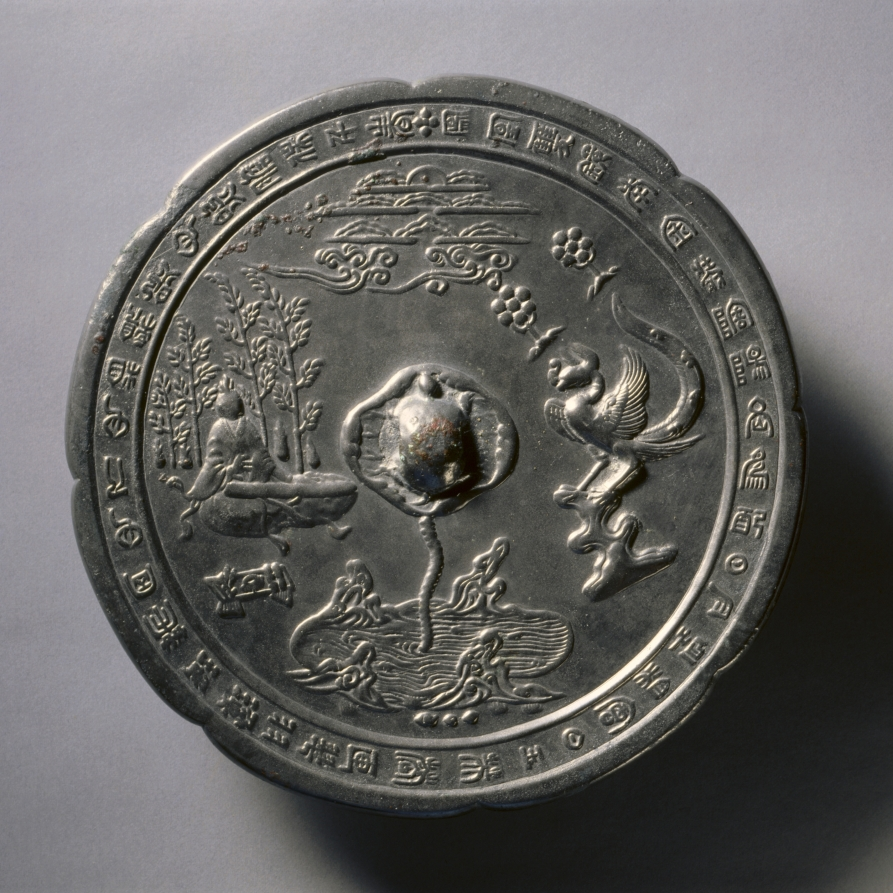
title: Lobed Mirror with a Tortoise Knob, Musician, and Phoenix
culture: China, Tang dynasty (618-907)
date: late 700s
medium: bronze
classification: Metalwork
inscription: 鳳凰雙鏡南金裝。陰陽各為配，日月恒相會。白玉芙蓉匣，翠羽瓊瑤帶。同心人，心相親，照心照膽保千春。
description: The inscription on this mirror states it was one of a pair made of metals from the south, and placed in a jade box, perhaps alluding to a wedding gift. The meaning of its design is not entirely known, but may refer to the Daoist immortal Hou Jin, who played the qin (stringed instrument), understood the language of birds, and could make predictions based on the reflections on water. The motifs of the phoenix, the pond, and the qin may all refer to the quest for immortality.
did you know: The imagery of this mirror includes a tiny turtle knob accompanied by a musician and phoenix.